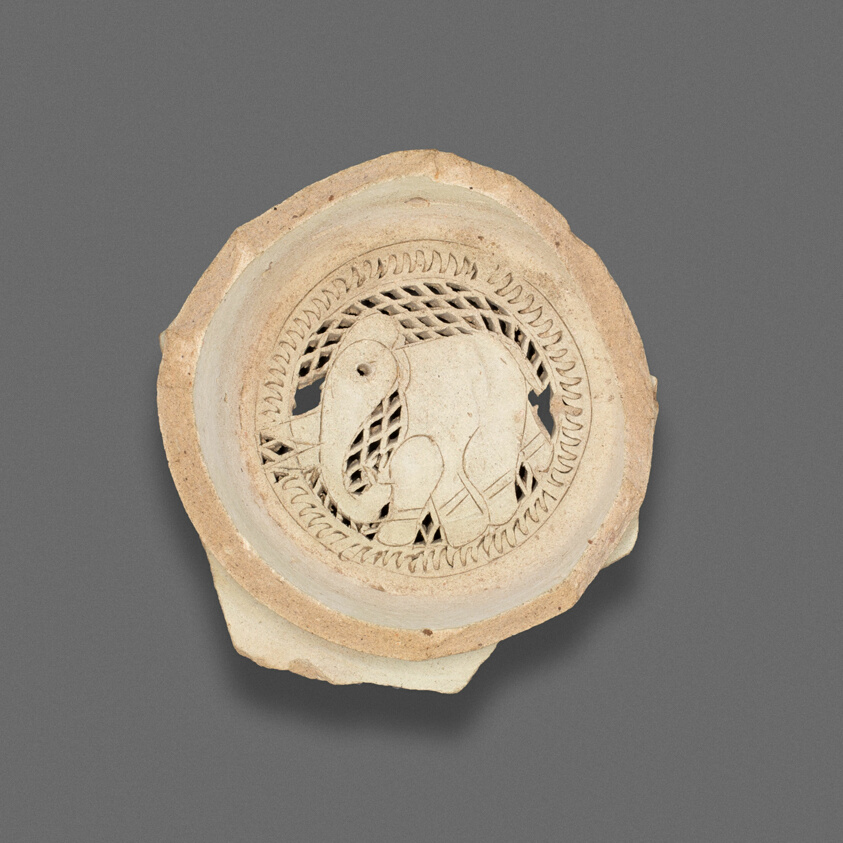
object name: Ceramics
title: Water Filter with an Elephant Figure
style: fostat, fatimid, Islamic (culture or style)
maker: Egypt; Fustat (Cairo)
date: Fatimid dynasty (969–1171), 11th/12th century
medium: Earthenware with pierced and incised decoration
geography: Old Cairo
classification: ceramics; asian art; architectural fragment